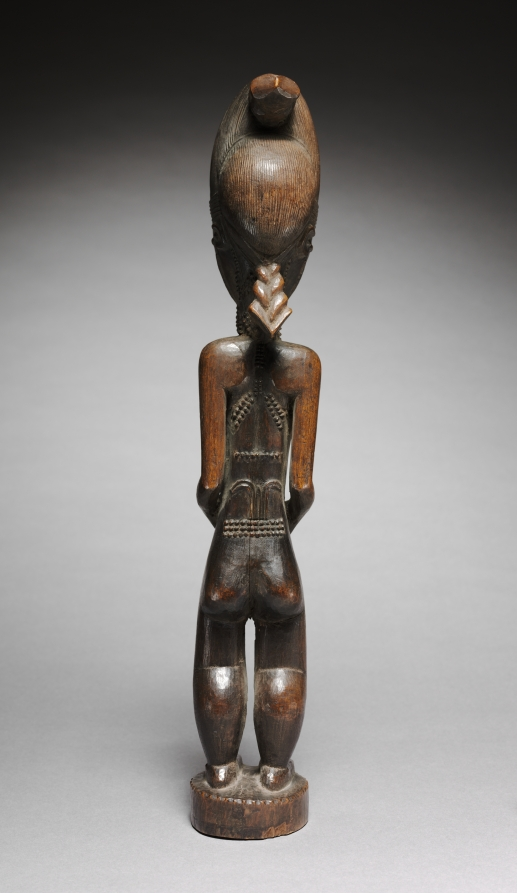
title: Male Figure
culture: Africa, West Africa, Côte d'Ivoire, Baule peoples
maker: Totokro Master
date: by 1931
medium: wood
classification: Sculpture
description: Purported to be the earliest surviving work by a Baule carver who art historians have dubbed the "Totokro Master," this Male Figure typically comes as a pair of male and female sculptures, and serves as a bridge between the spirit (asye usu) and human worlds in the hand of Baule diviners. Representing idealized humans in their prime, the diviners consider them suitable forms used to cast out disruptive spirits. It is featured here without the female example. The African Art Sponsors—a group of donors associated with Cleveland’s Karamu House, the oldest African American theater group in the country—purchased this Baule male figure in 1929 and donated it to the museum in 1931.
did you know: In Baule society, the name of the artist who made a sculpture is not always public knowledge. In 1999, art historian Susan Vogel gave the sculptor of this work and others similar in style the nickname "Totokro Master" for the geographic region they came from.